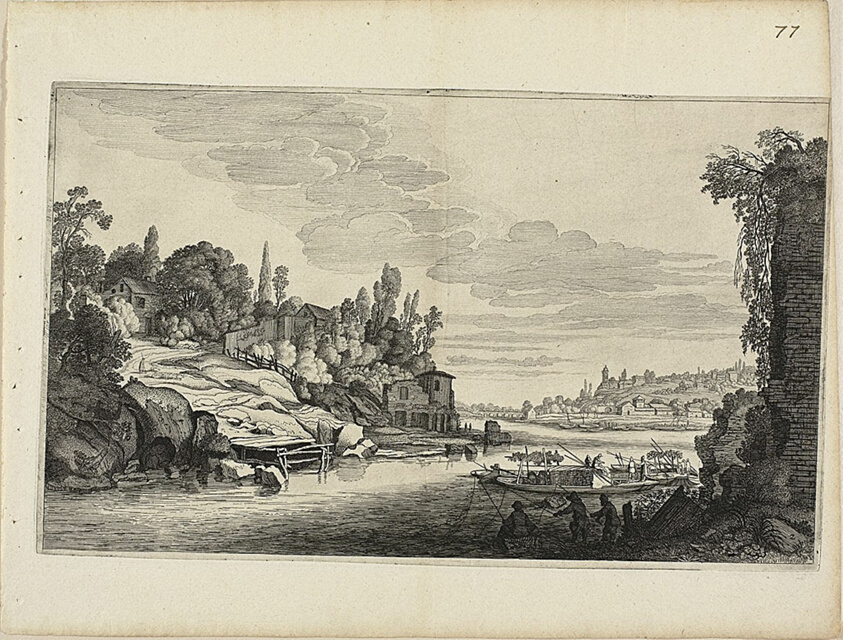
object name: Print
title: River Landscape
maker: Jan van de Velde II (Dutch, c. 1593-1641); after Pieter de Molijn (Dutch, 1595-1661)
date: 1646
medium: Engraving on cream laid paper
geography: Netherlands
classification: print; prints and drawing